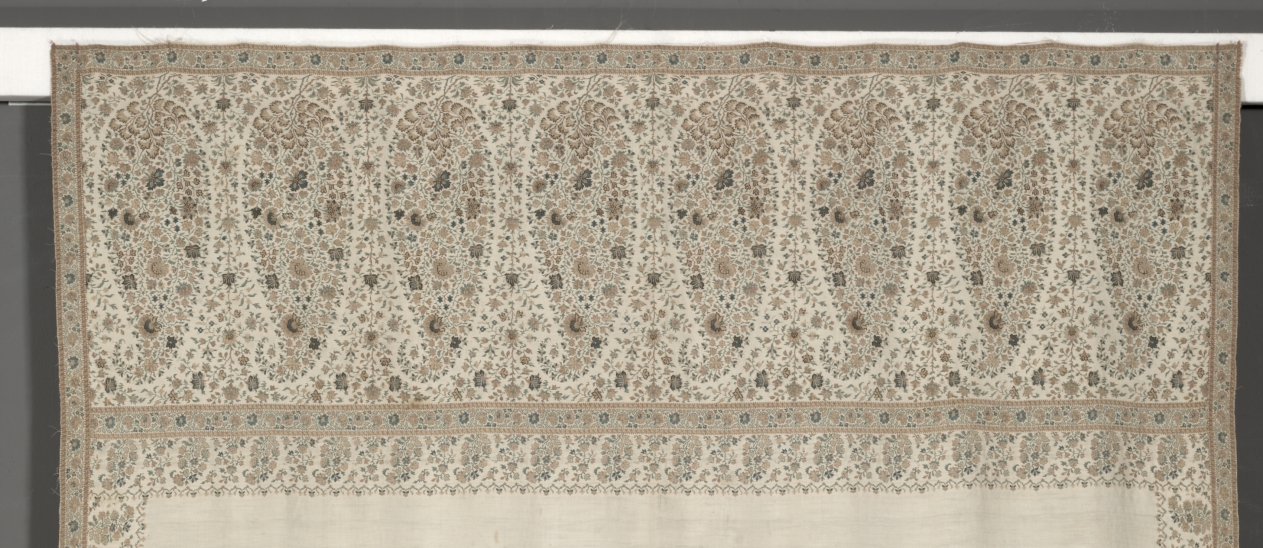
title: Long Shawl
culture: Europe (England, Scotland or France), 19th century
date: c. 1815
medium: Twill weave ground with supplementary weft pattern in 2/1 (Z) weave twill; silk, cotton; clipped pattern wefts on back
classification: Textile